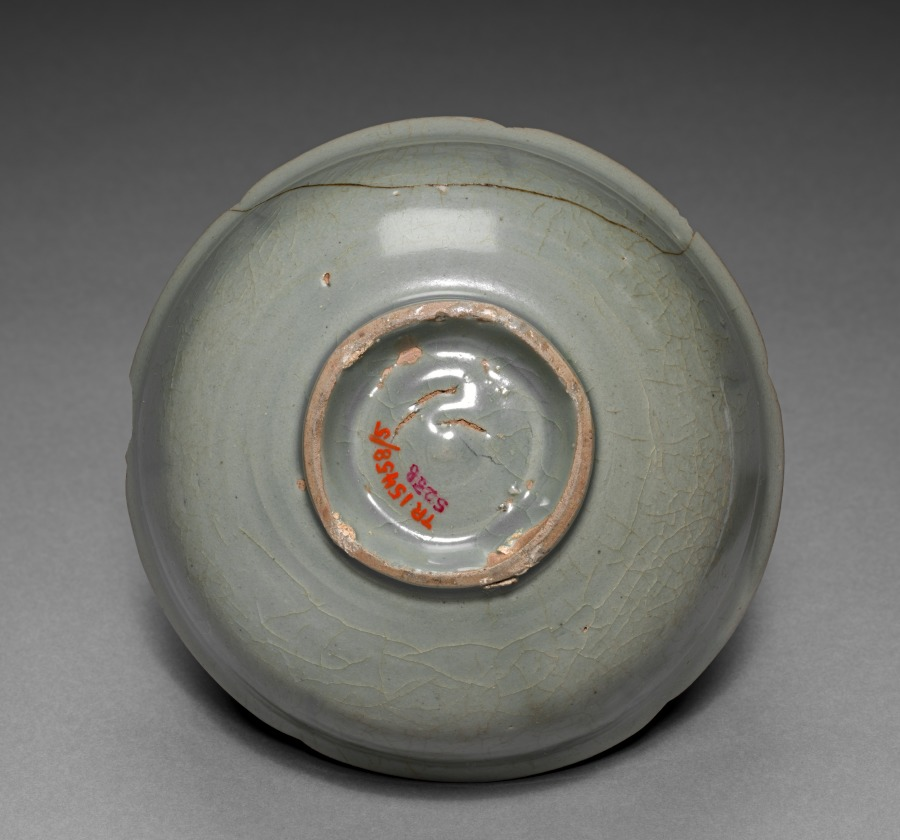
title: Floral-shaped Bowl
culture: Korea, Goryeo dynasty (918–1392)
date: 1100s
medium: Ceramic, glazed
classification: Ceramic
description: Celadons, spoons, seals, and bronze mirrors were the most common burial objects in tombs during the Goryeo period (918–1392). Furnishing tombs with an elaborate assemblage of objects was believed to honor and comfort the newly dead. Generally, Goryeo tombs were left untouched until the late 19th century. During the colonial period (1910–45), however, Japanese archaeologists competitively excavated the tombs located in Kaeseong, the former capital of the Goryeo period. This elegant floral-shaped cup was probably one of those grave goods excavated during the Japanese colonial period.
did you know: Elites of the Goryeo period are known for their love of drinking tea and wine. This type of delicate-looking cup not only made their drinking experience more enjoyable, but also showed their refined taste.